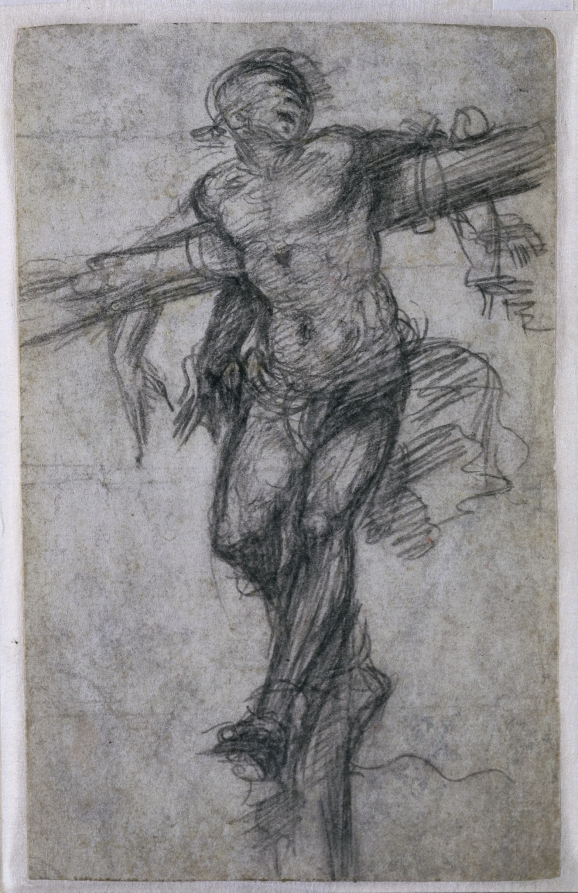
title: The Unrepentant Thief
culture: Italy, 16th century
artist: Sodoma (Italian, 1477–1549)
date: c. 1530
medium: black chalk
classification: Drawing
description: Two thieves were crucified with Christ on Mount Golgotha. One, recognizing Christ's innocence, re-pented his sins, while the other reviled him. In paintings of the crucifixion, this unrepentant thief is depicted at Christ's left. The angle of the cross in this drawing indicates that it is the unrepentant thief who here struggles against the binding ropes. Sodoma was born and trained in Lombardy, but spent most of his life in Siena, where he dominated Sienese painting during the first half of the 16th century. Known for his emotionally charged paintings as well as for his eccentric lifestyle, Sodoma's individuality is evident in his drawings. Here, in the first drawing by this important Renaissance artist to enter the museum's collection, the scratchy and trailing lines of the figure, with its various pentimenti (changes) create the active tension and nervous movement that both enliven the form and suggest the pain of the suffering thief.